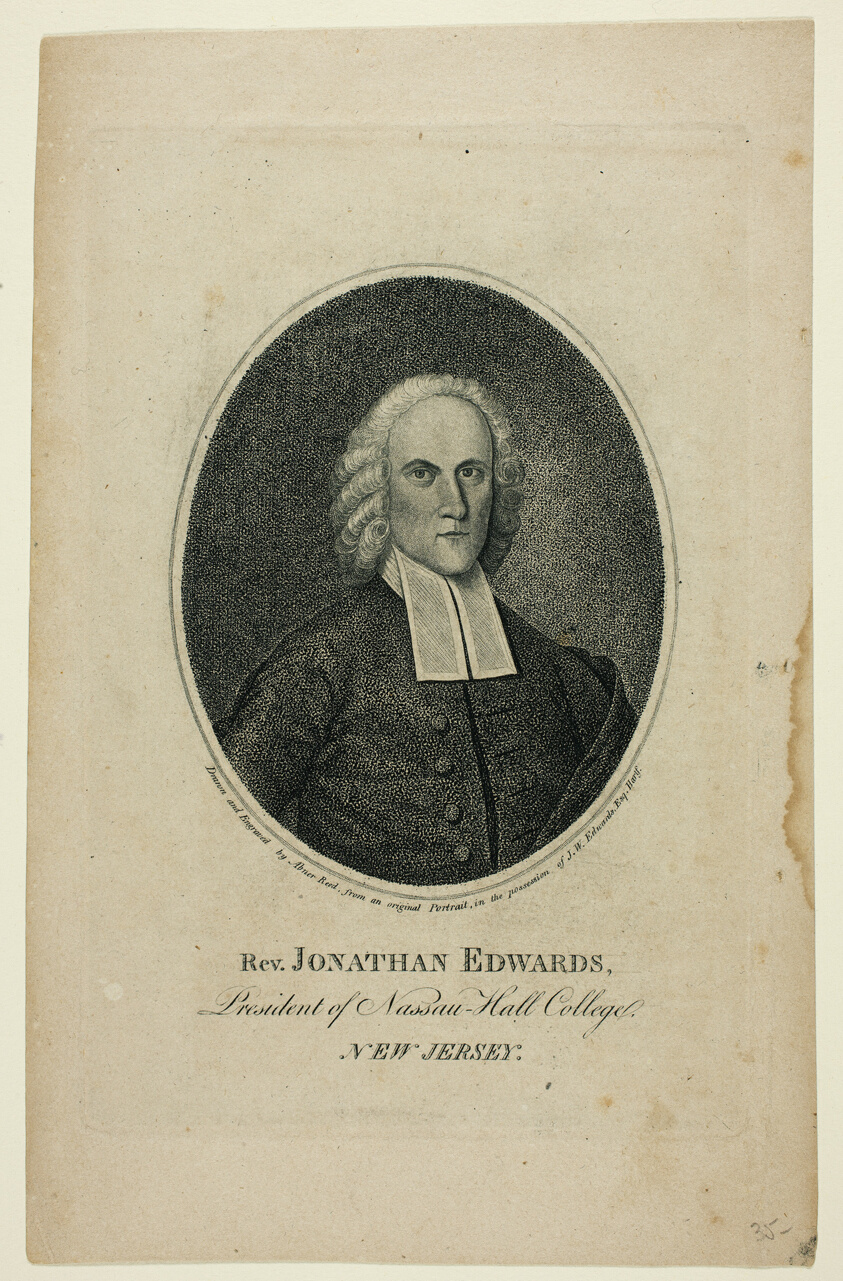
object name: Print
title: Reverend Jonathan Edwards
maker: Abner Reed (American, 1771–1866)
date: 1808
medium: Engraving on cream wove paper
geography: United States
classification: engraving; print; prints and drawing